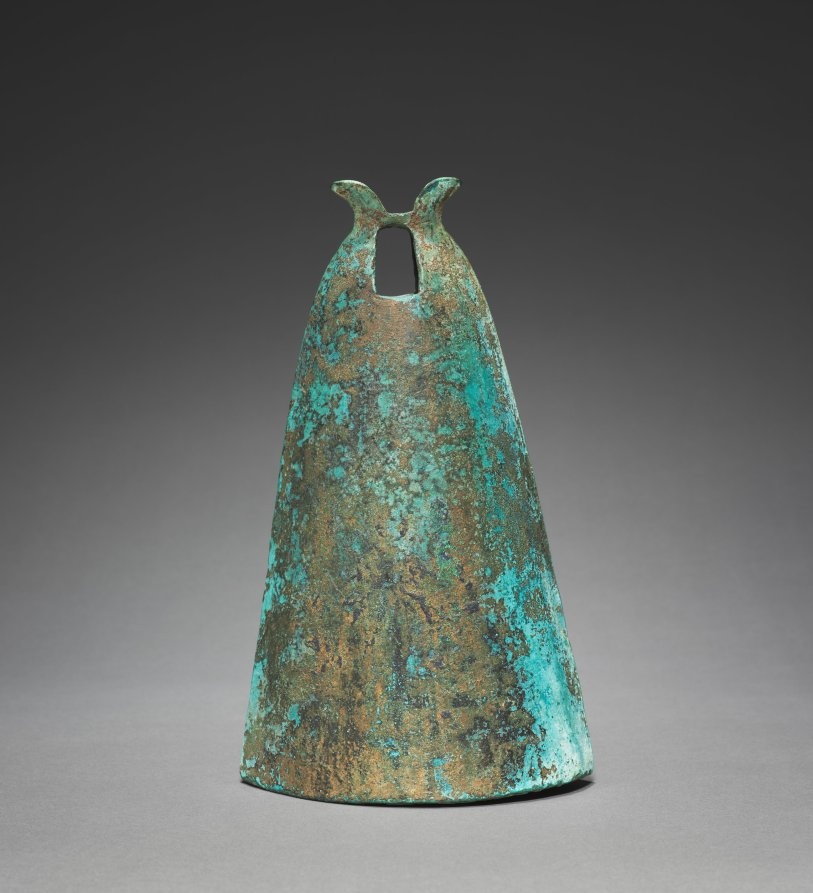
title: Bell with Diamond-Shaped Insignia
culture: China, along the southern borders, Eastern Zhou dynasty (770–256 BCE) to Han dynasty (202 BCE–220 CE)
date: 300s–100s BCE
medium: bronze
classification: Metalwork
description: These rare, elegant bronze bells were made in a tribal village along the southern borders of China. They differ greatly from bells made in the central regions, which often come in large sets and in varying sizes, and feature complex decorative patterns. The distinctive shape of these bells resembles a tall helmet topped by a pair of horns. A rope may have been tied around the horns so that the bells could be suspended. Each bell is decorated with a diamond-shaped insignia—probably to mark tribal affiliation. Although the bells are identical in size, each produces a different tone, which indicates that their casting was a highly refined process.